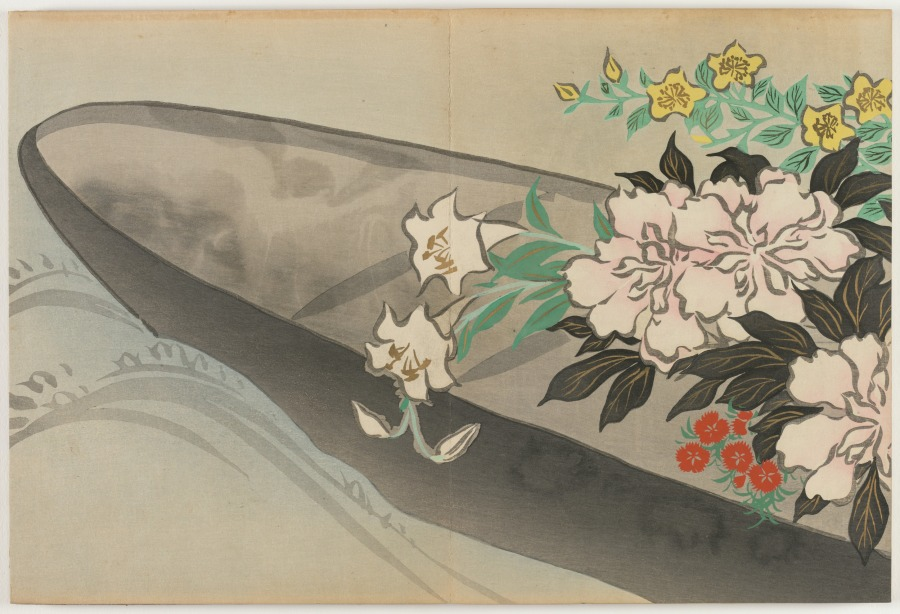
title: Flowers of a Hundred Worlds (Momoyogusa): Flower boat (Hanabune)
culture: Japan, Meiji period (1868–1912)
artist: Kamisaka Sekka (Japanese, 1866–1942)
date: 1909–10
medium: color woodcuts with gold and silver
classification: Bound Volume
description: This print from a set of three woodblock printed albums displays the graphic design prowess of Kamisaka Sekka. The images were first distributed one by one to subscribers to the series but later were reissued in bound form, like this book, for mass consumers. Each print features a vignette taken from nature or Japanese literature. Many of the scenes have a long history in Japan, originating in the 900s or 1000s and having been interpreted by all manner of artists since that time. Sekka’s selections hew closely to precedents from the Rinpa style originated by painter Tawaraya Sōtatsu (c. 1570–c. 1640) and calligrapher Hon’ami Kōetsu (1558–1637).